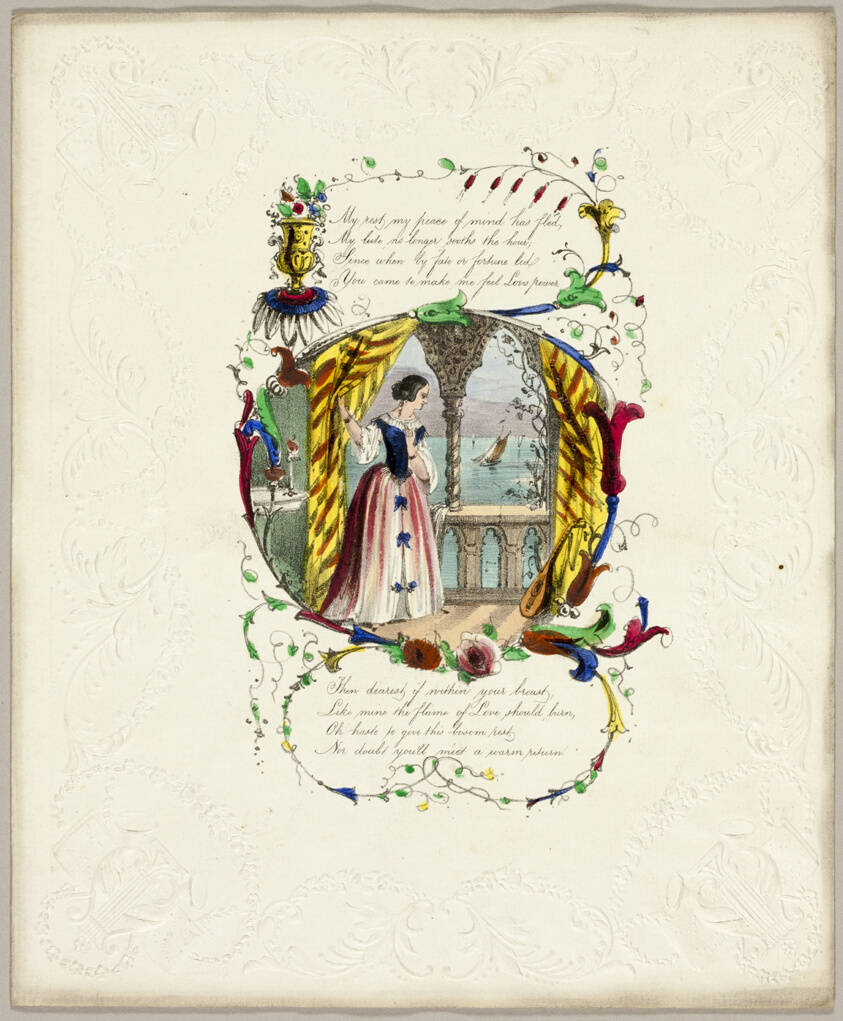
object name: Print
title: My Rest, My Peace of Mind Has Fled (Valentine)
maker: George Kershaw (English, 19th century)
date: c. 1840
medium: Lithograph with hand-coloring on embossed ivory wove paper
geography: England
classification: valentine; prints and drawing; print